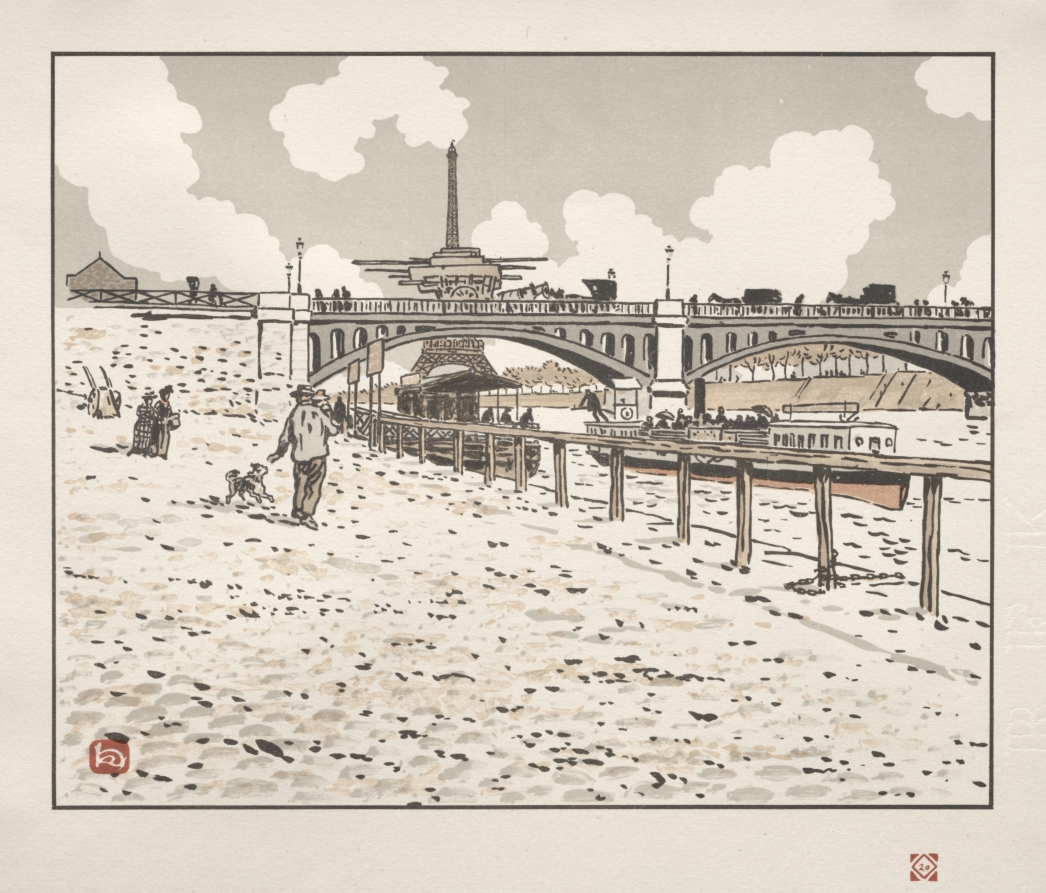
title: Thirty-Six Views of the Eiffel Tower: From the Grenelle Bridge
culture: France, early 20th century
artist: Henri Rivière (French, 1864–1951)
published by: Printed by Verneau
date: 1902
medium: color lithograph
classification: Print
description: As the center of Paris became an increasingly costly place to live, people with moderate incomes moved further out to places like Grenelle, on the southwest border of the city. Industry was also routed out of central Paris for aesthetic and sanitary reasons so that smokestacks were a common sight along the city’s perimeter. Grenelle was home to a number of metal-working industries, and in this scene the Eiffel Tower, close to the composition’s center, adopts the form of a factory smokestack. A white cloud at its tip suggests a puff of smoke.